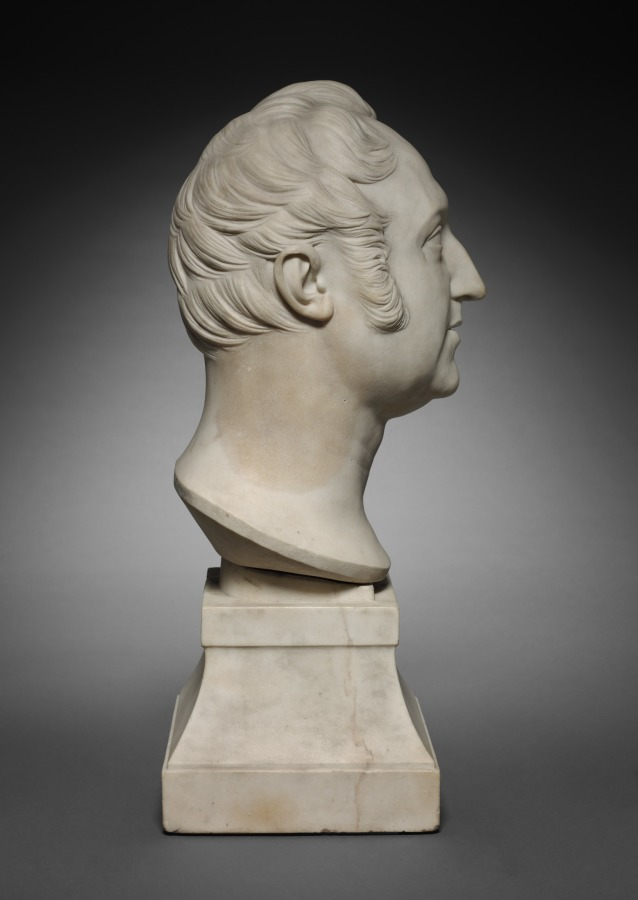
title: Bust of Rossini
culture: France, 19th century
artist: Pierre Jean David d'Angers (French, 1788–1856)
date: 1831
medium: marble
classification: Sculpture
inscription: inscribed at back of neck: A / Joachino Rossini de Pesaro / P.J. David d'Angers / 1831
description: Gioacchino Antonio Rossini (1792–1868) was a composer most famous for his comic operas. Although of Italian birth, much of Rossini's later life was spent in Paris, where he undoubtedly sat for this portrait for David d'Angers, whose ambition it was to sculpt portraits of all the famous people of his day.